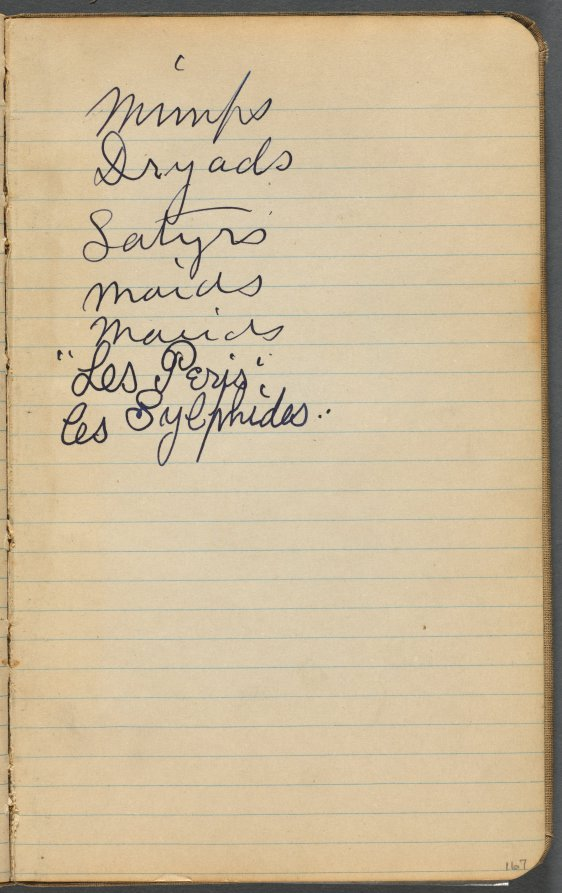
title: Sketchbook, page 167: Notes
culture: America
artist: Maurice Prendergast (American, born Newfoundland [now Canada], 1858–1924)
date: 1905–10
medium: graphite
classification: Bound Volume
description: This sketchbook contains 69 pages of drawings, a diary largely devoted to the state of the artist's health, and a three-page discourse on the nature of genius and ideas.